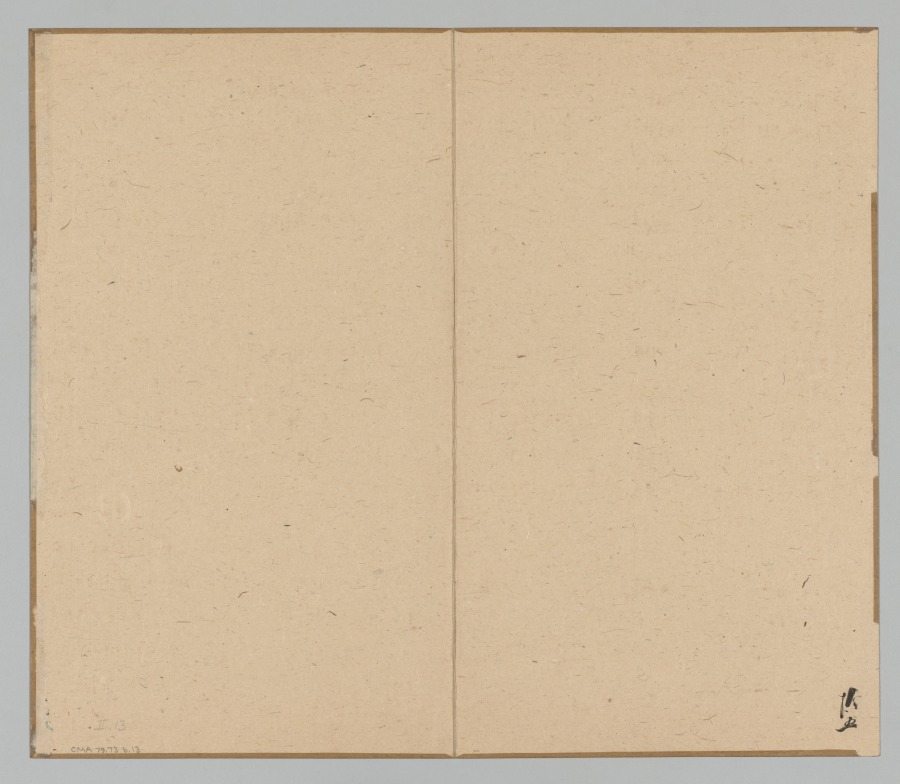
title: Reverberations of Taiga, Volume 2 (leaf 13)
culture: Japan, Edo period (1615–1868)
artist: Aoki Shukuya (Japanese, d. 1802)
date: mid- to late 1700s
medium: double-leaf from a pair of albums; ink and light color on paper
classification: Portfolio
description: Traditionally, young painters in Japan began their studies with an established master-painter. The master's compositions invariably became models that the apprentice copied to learn various ink and brush techniques. Shukuya was a pupil of the famous Kyoto artist Ikeno Taiga, whose style is reflected in these sketches of rocks, trees, and mountains.